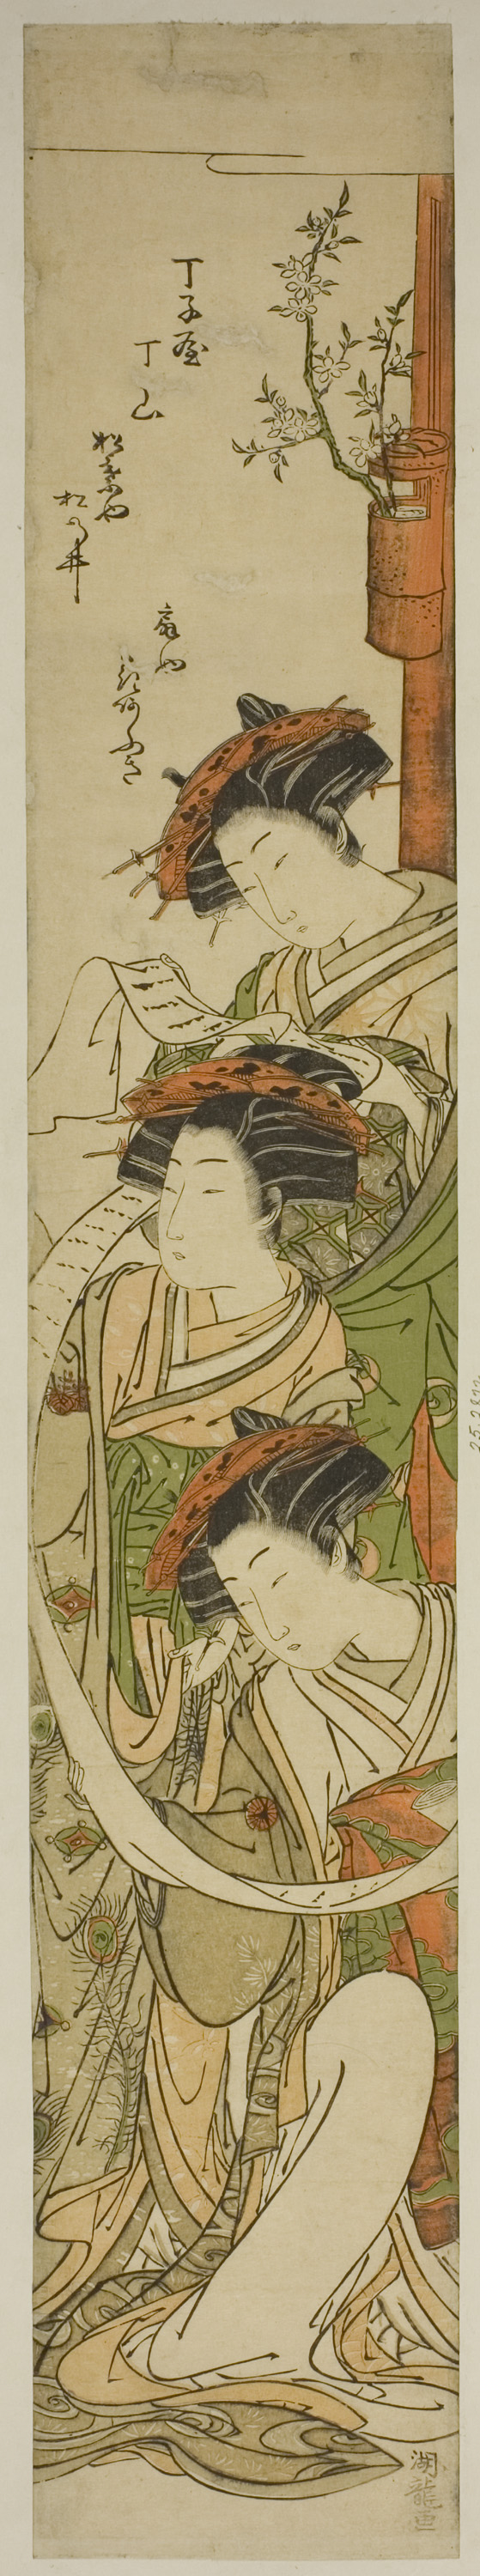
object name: Print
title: The Courtesans Chozan of the Chojiya, Hanaogi of the Ogiya, and Matsunoi of the Matsubaya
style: Japanese (culture or style)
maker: Isoda Koryusai (Japanese, 1735-1790)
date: c. 1776/81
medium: Color woodblock print; hashira-e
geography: Japan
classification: woodblock print; print; asian art